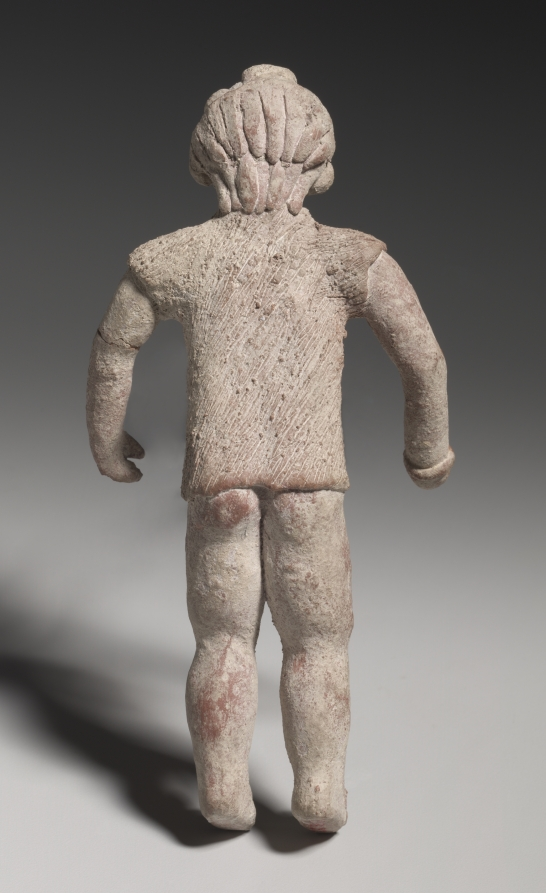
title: Figurine Holding A Ball(?)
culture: Mexico, Guerrero, Xochipala style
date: 1500–500 BCE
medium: earthenware, pigment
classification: Ceramic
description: Ballgame ceremonialism and art peaked between AD 600 and 1100 in Veracruz and elsewhere, but forms of a ballgame were played at most times and places in Mesoamerica. This charming figurine, which seems to hold a ball, illustrates that the game developed much earlier, although we know little about its meaning during this period.